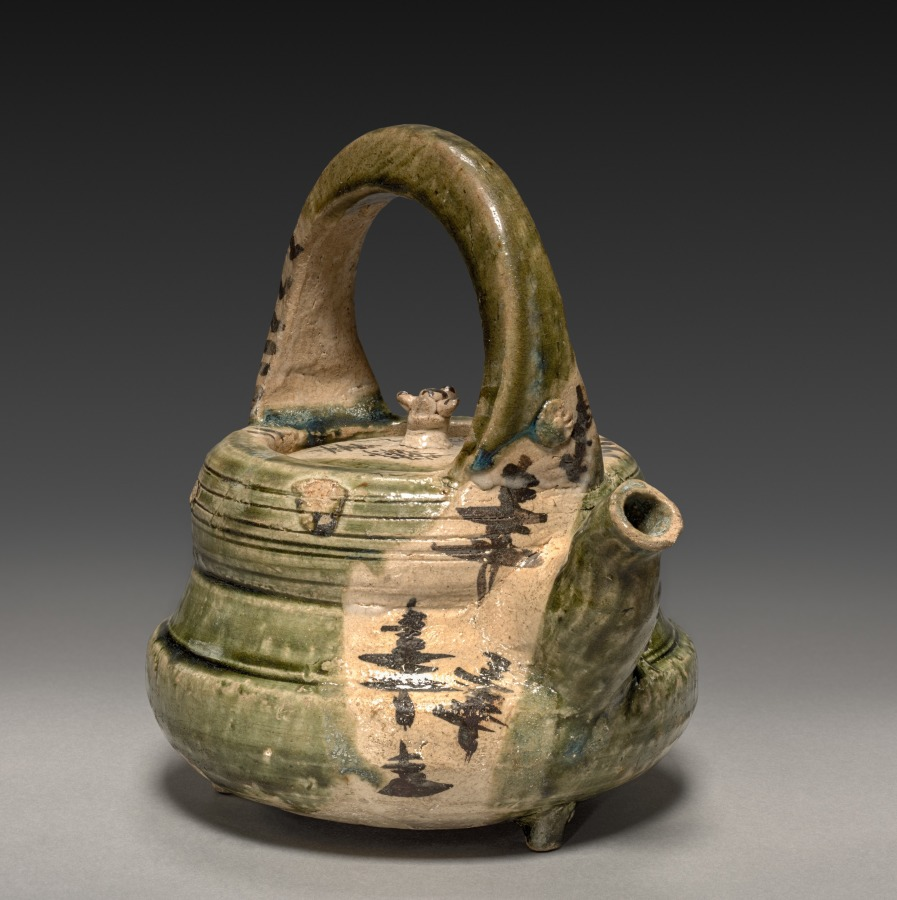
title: Ewer (Suichū)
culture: Japan, Momoyama period (1573–1615)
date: early 1600s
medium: Glazed stoneware with iron oxide underglaze slip (Mino ware, Oribe type)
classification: Ceramic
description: This ewer was made to replenish the jar that holds water for rinsing teabowls and filling the iron kettle at tea gatherings. Highly abstracted pine trees, cascading ivy, stripes, and grids make up the designs in underglaze iron oxide, while the overall surface alternates between a transparent glaze and a green glaze characteristic of some Oribe tea wares.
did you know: Oribe wares are named for the tea master Furuta Oribe, who initiated the flamboyant designs that characterize them.